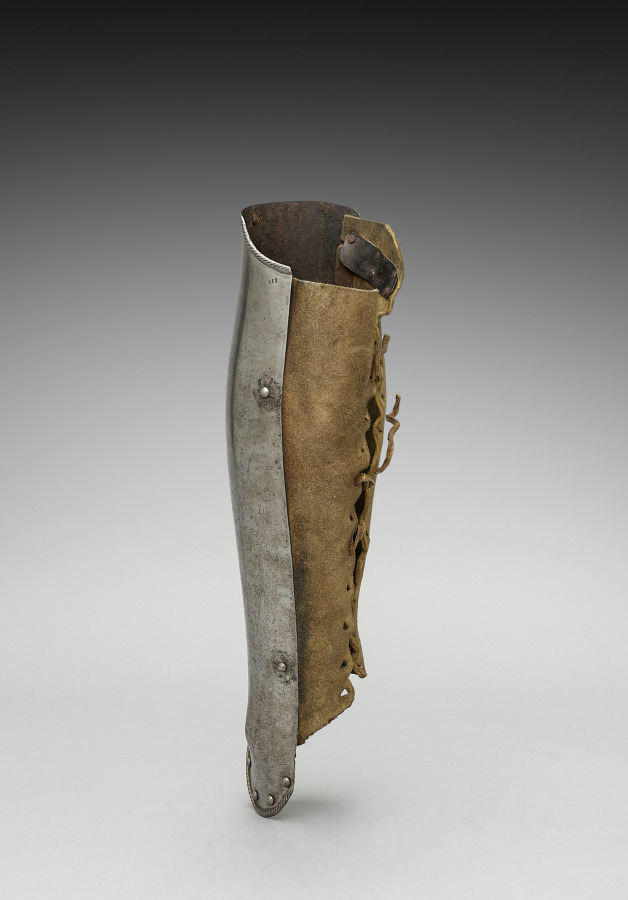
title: Left Greave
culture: Germany, 19th century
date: 1801–1900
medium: steel with black paint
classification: Arms and Armor